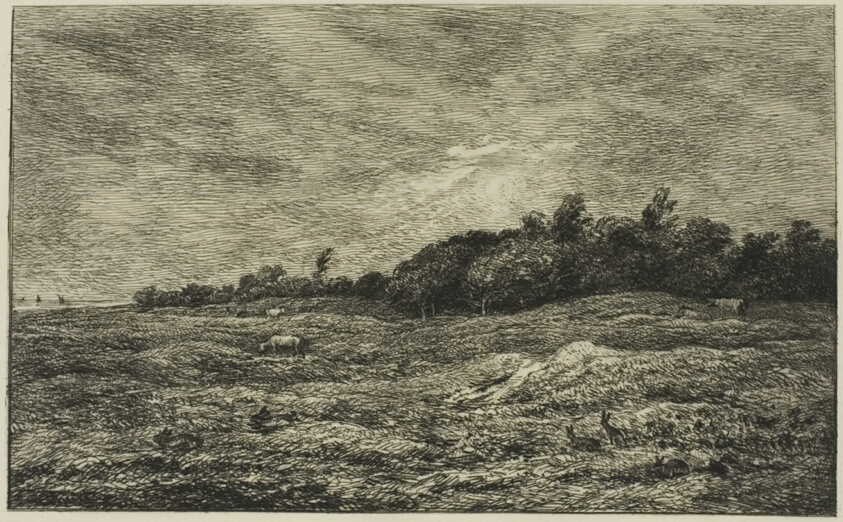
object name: Print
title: Le Pré des Graves à Villerville (Calvados)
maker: Charles François Daubigny (French, 1817-1878)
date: 1875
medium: Etching and drypoint on cream Japanese paper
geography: France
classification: etching; print; prints and drawing